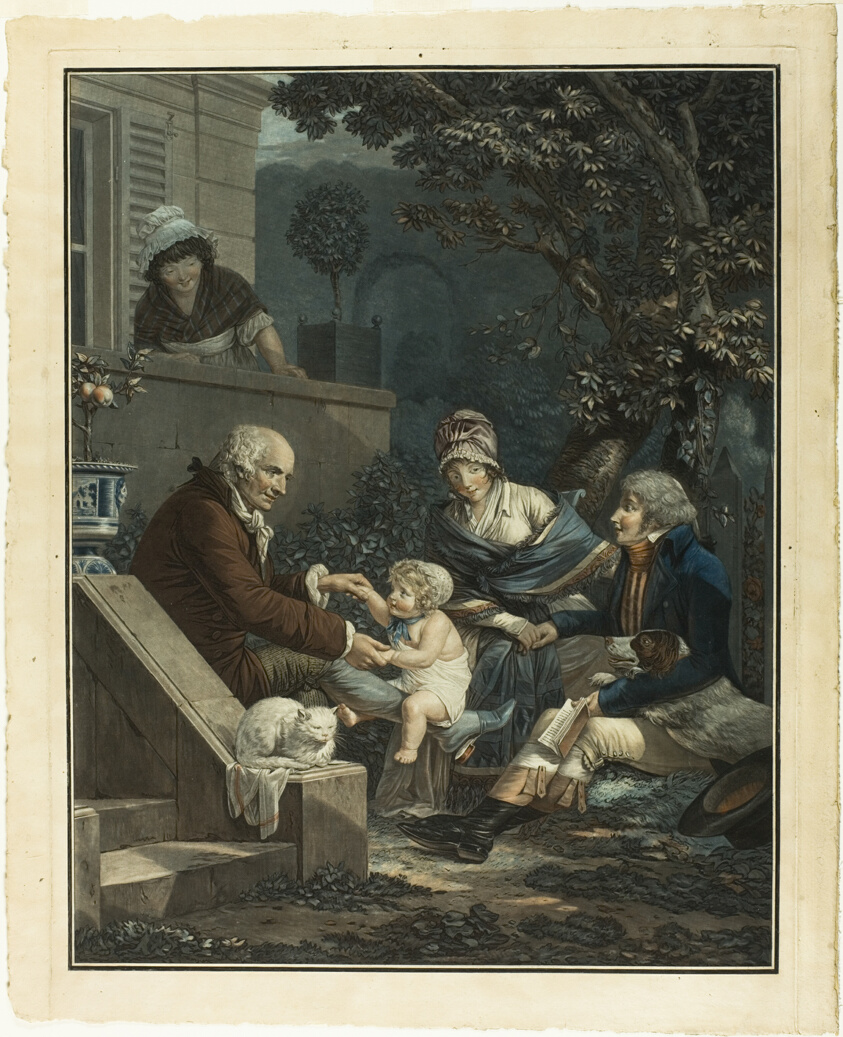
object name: Print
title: Paternal Pleasures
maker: Philibert Louis Debucourt (French, 1755-1832)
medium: Color aquatint with etching in black ink on cream wove paper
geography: France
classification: etching; print; prints and drawing